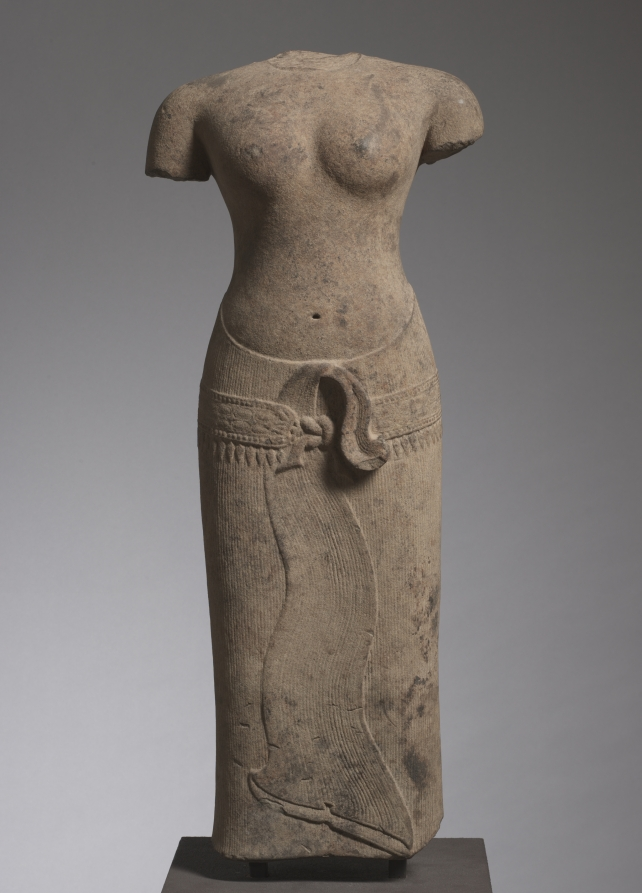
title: Standing Female Figure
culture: Cambodia, Angkor, Baphuon, Angkorean Period (877-1431)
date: 1050–75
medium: sandstone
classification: Sculpture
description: Though many iconographic elements were adopted from India, Khmer sculptors resisted the exaggerated voluptuous form of Indian female figures. They maintained the subtler figural styles that convey a distinctively Khmer ideal of the female form. This sculpture exemplifies the figural style and mode of dress of the Baphuon sculptures, a royal temple in Angkor built by King Udayadityavarman II (reigned 1050-1066). Since other figures from the Baphuon depict images of or related to Shiva, it is possible to identify this female figure as his wife Parvati.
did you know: The figure wears an elaborate belt decorated with pendants around her sarong.